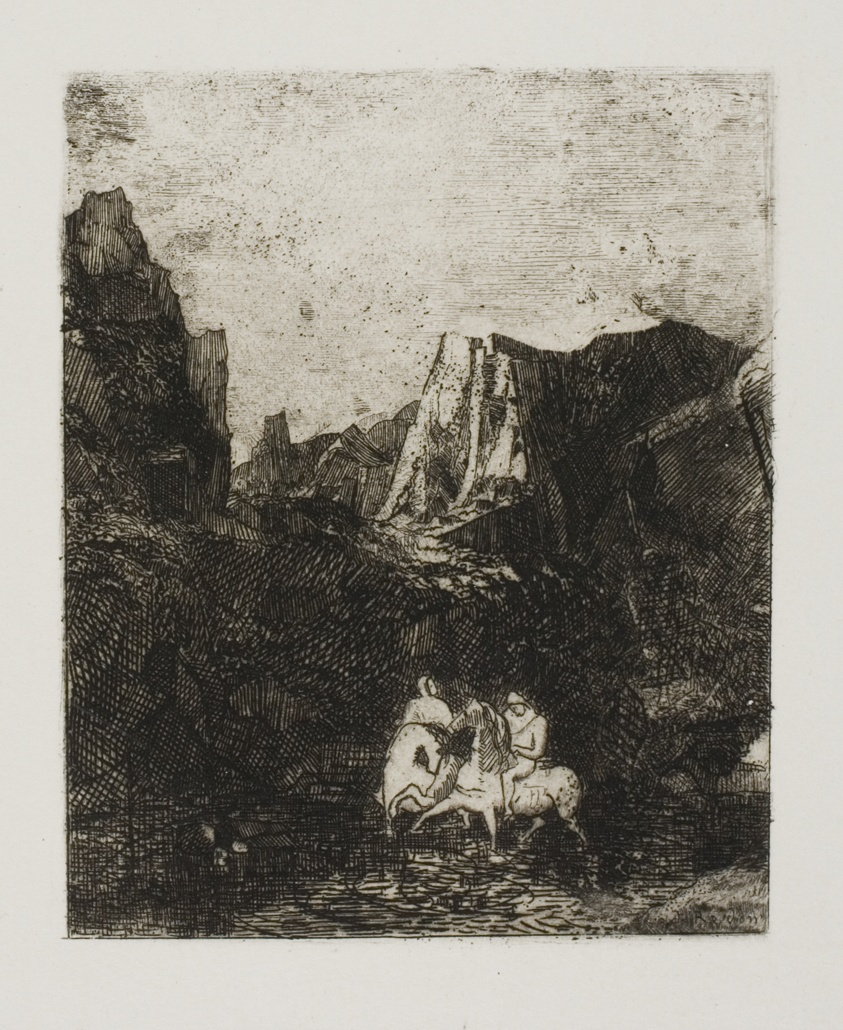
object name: Print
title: The Two Small Horsemen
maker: Odilon Redon (French, 1840-1916)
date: 1865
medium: Etching on ivory wove paper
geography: France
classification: etching; print; prints and drawing; paper